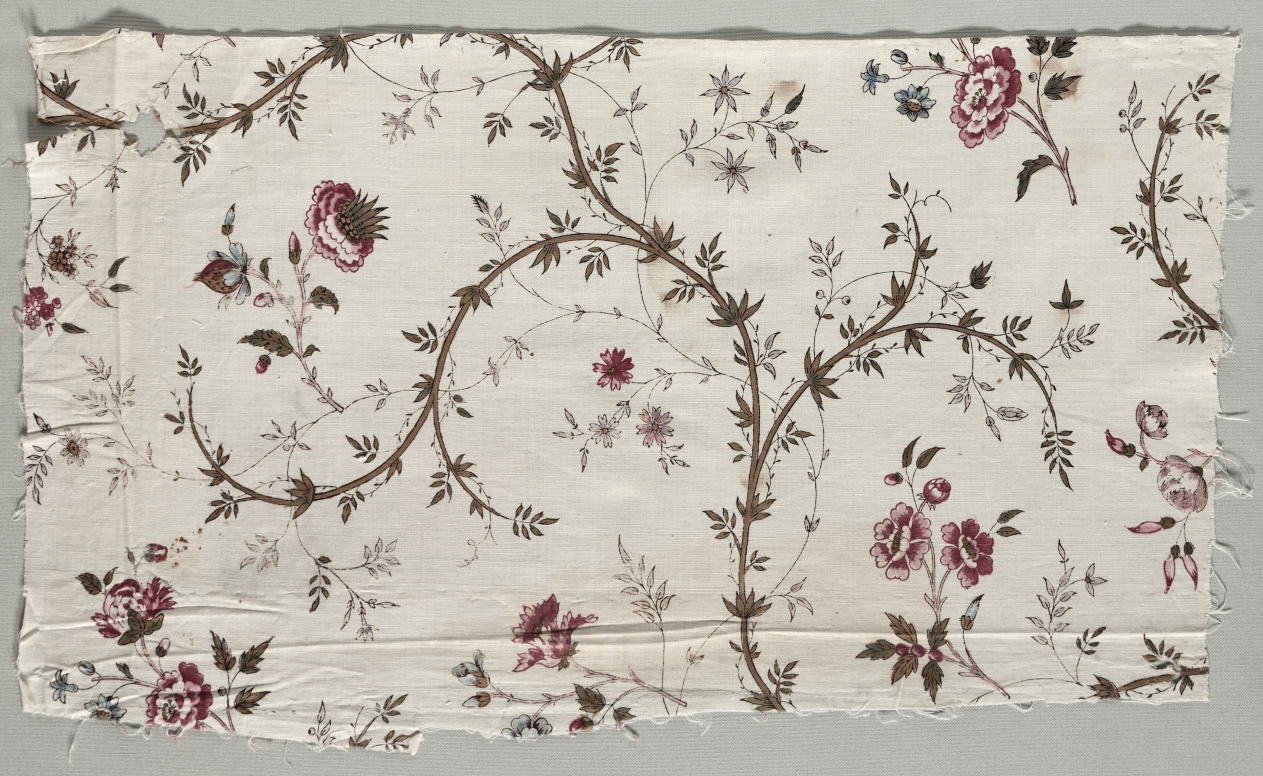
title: Woodblock Printed Cotton Fragment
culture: England, late 18th century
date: 1785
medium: woodblock print on cotton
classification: Textile